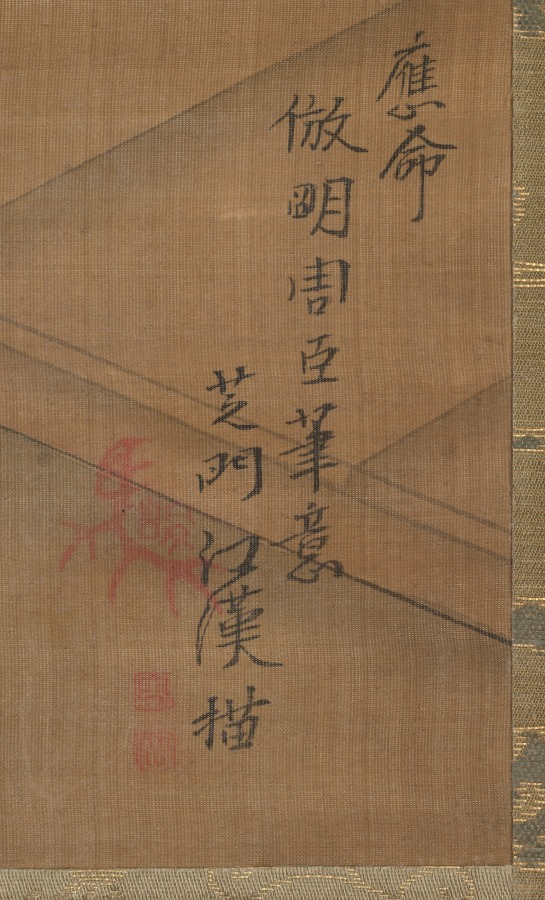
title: Beauty (Bijin) in the Snow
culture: Japan, Edo period (1615–1868)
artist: Shiba Kōkan (Japanese, 1747–1818)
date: c. 1775–1818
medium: hanging scroll; ink and color on silk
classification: Painting